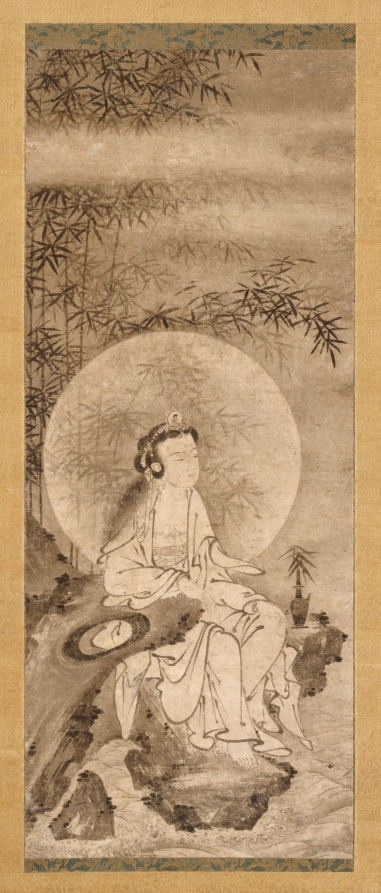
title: White-Robed Guanyin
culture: China, Southern Song dynasty (1127-1279)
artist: attributed to Zhang Yuehu (Chinese, active 1200s)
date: late 1200s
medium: Hanging scroll; ink on paper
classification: Painting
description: The figure here sits on a rocky elevation representing Potalaka in the Southern Sea, Avalokitesvara’s island home. A vase with a bamboo sprig holds pure water, the nectar of life. Bamboo shines through the figure’s halo, a way of seeing the illusionary world through the Buddhist truth. Avalokitesvara (Guanyin in Chinese), the bodhisattva of compassion, was integrated into the Chan Buddhist canon of venerated beings. In this context, the bodhisattva is often depicted in its female manifestation as the White-Robed Guanyin. The worship of the feminine White-Robed Guanyin has its origins on Mount Tianzhu in Hangzhou, where Qian Liu (852–932), ruler of the Wuyue kingdom, established the Upper Tianzhu Monastery to venerate her image.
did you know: As an artist, Zhang Yuehu was better known in Japan than in his own country.